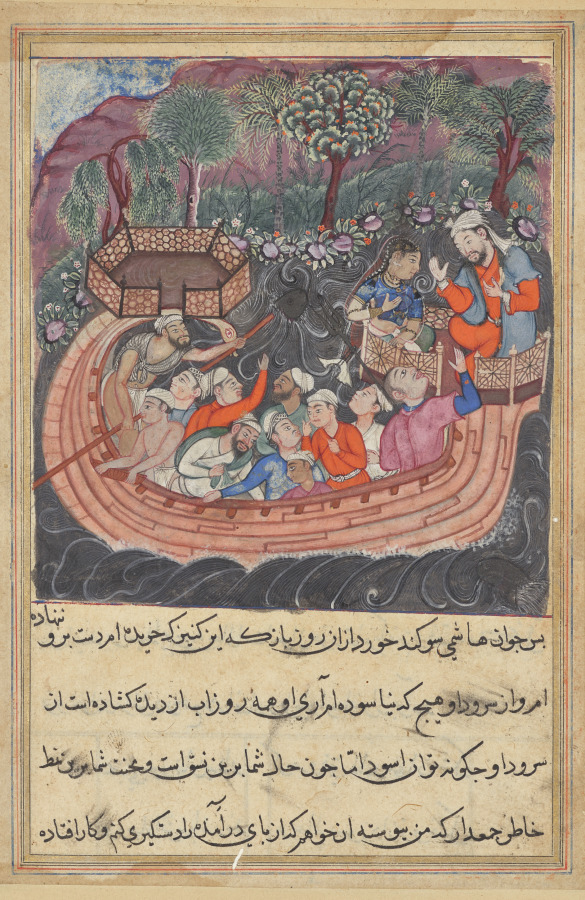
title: The young man of Baghdad reveals his true identity to the Hashimi, from a Tuti-nama (Tales of a Parrot: Forty-eighth Night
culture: Mughal India, court of Akbar (reigned 1556–1605)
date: c. 1560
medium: gum tempera, ink, and gold on paper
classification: Painting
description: At the front of the ship, the young man calls out to the Hashimi, who sits beside the weeping slave girl. Despite their love, the destitute young man had been forced to sell the girl. She is overjoyed to see her long-lost lover and begins to sing so beautifully that the birds, fish, and the ocean itself join in the celebration.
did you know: Two black fish are visible in the swirling waters of the ocean.